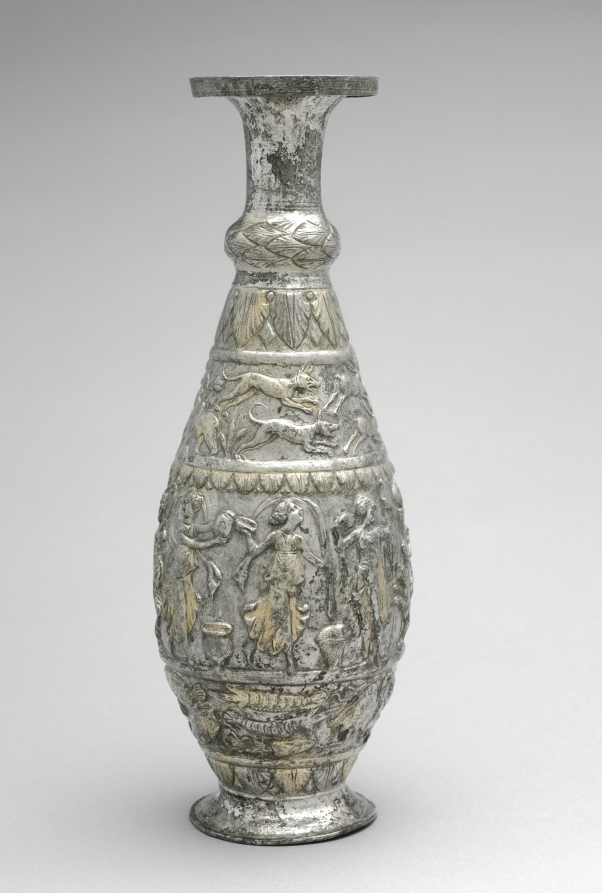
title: Ewer (Pitcher) with Game, Seafood, and Wine Scenes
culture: Byzantium, Syria(?), Byzantine period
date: late 300s CE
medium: silver with traces of gilding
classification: Metalwork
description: This magnificent pitcher, called a ewer, was almost certainly meant for serving wine in the dining room of a wealthy home. On its surface are images in three bands representing the expected bounty of the hunt. Deer pursued by a lioness and hares chased by dogs appear in the top band, signifying the wealth of game the owner hoped to have on the family table. In the lowest band are edible sea creatures, while the center features the merry followers of the Roman wine god Bacchus (Dionysos in Greek).